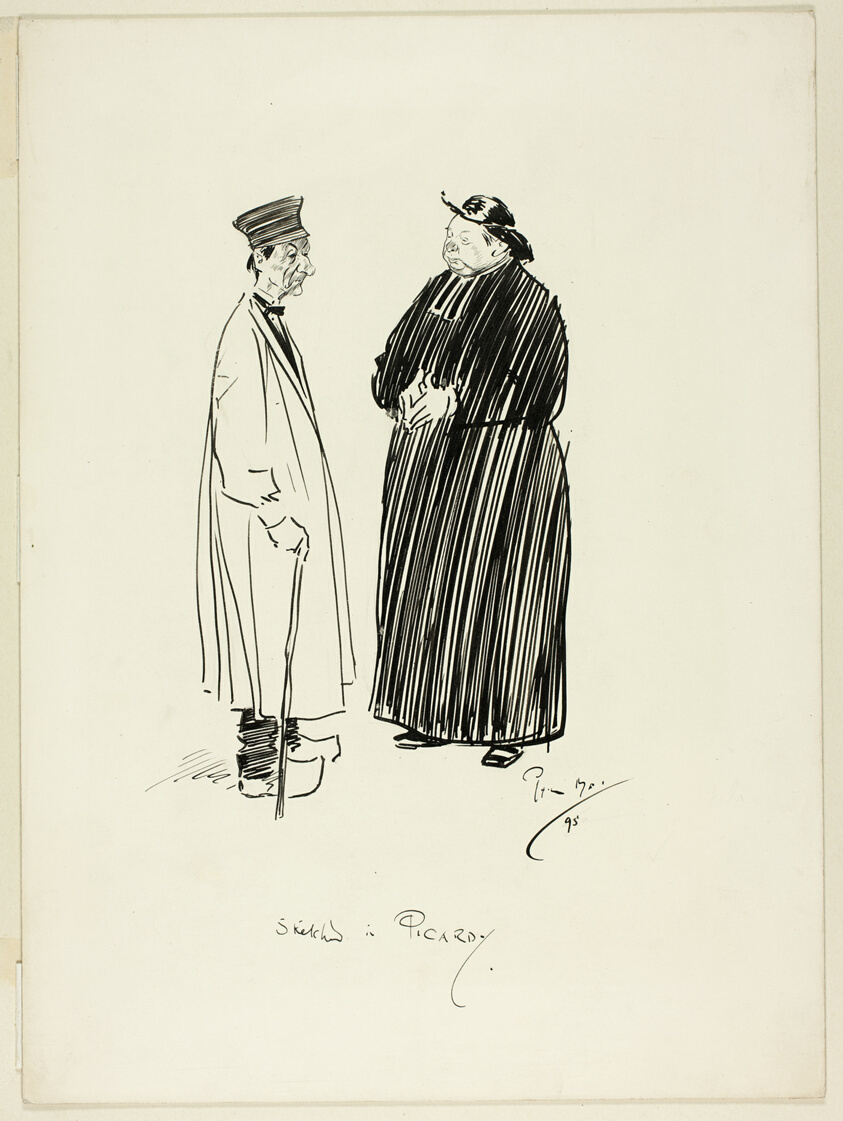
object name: Drawing and Watercolor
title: Sketch in Picardy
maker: Philip William May (English, 1864-1903)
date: 1895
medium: Pen and black ink over traces of graphite, on ivory wove card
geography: England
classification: pen and ink drawings; drawings (visual works); prints and drawing